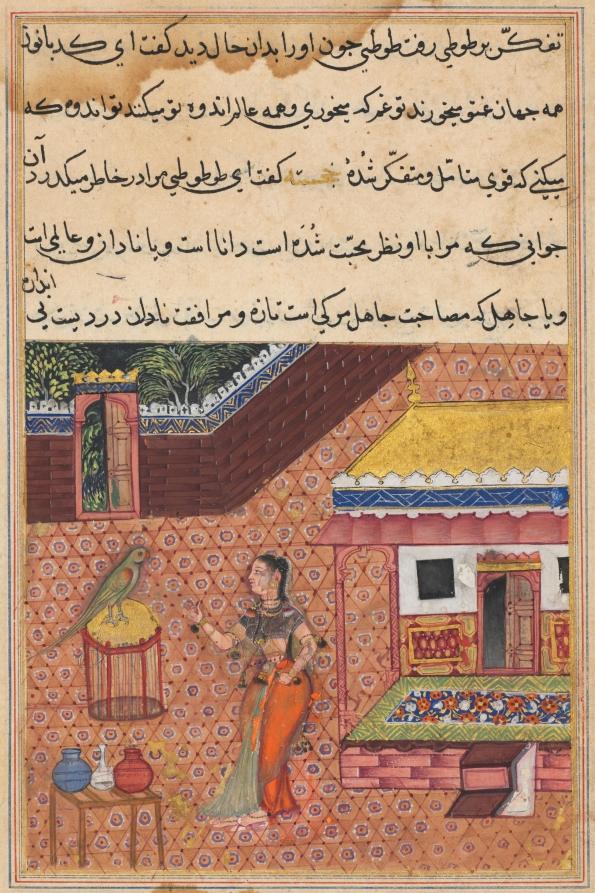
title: The parrot addresses Khujasta at the beginning of the thirty-fourth night, from a Tuti-nama (Tales of a Parrot)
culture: Mughal India, court of Akbar (reigned 1556–1605)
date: c. 1560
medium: gum tempera, ink, and gold on paper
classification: Painting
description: On the thirty-fourth of fifty-two nights, Tuti the wise parrot tells Khujasta two fantastical stories. The first is about the daughter of a merchant who was saved from an evil fairy by her many suitors. The second features the daughter of a raja who witnessed the miraculous resurrection of her dead husband and his friend.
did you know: A small cord around the parrot’s legs keeps him anchored to his cage.